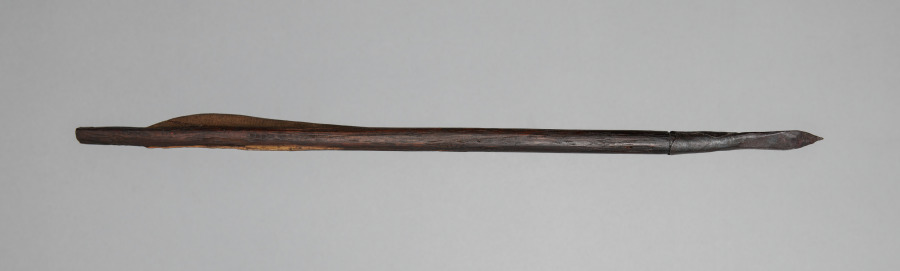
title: Crossbow Bolt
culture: Germany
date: 1500s-1600s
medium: wood, leather, steel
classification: Arms and Armor